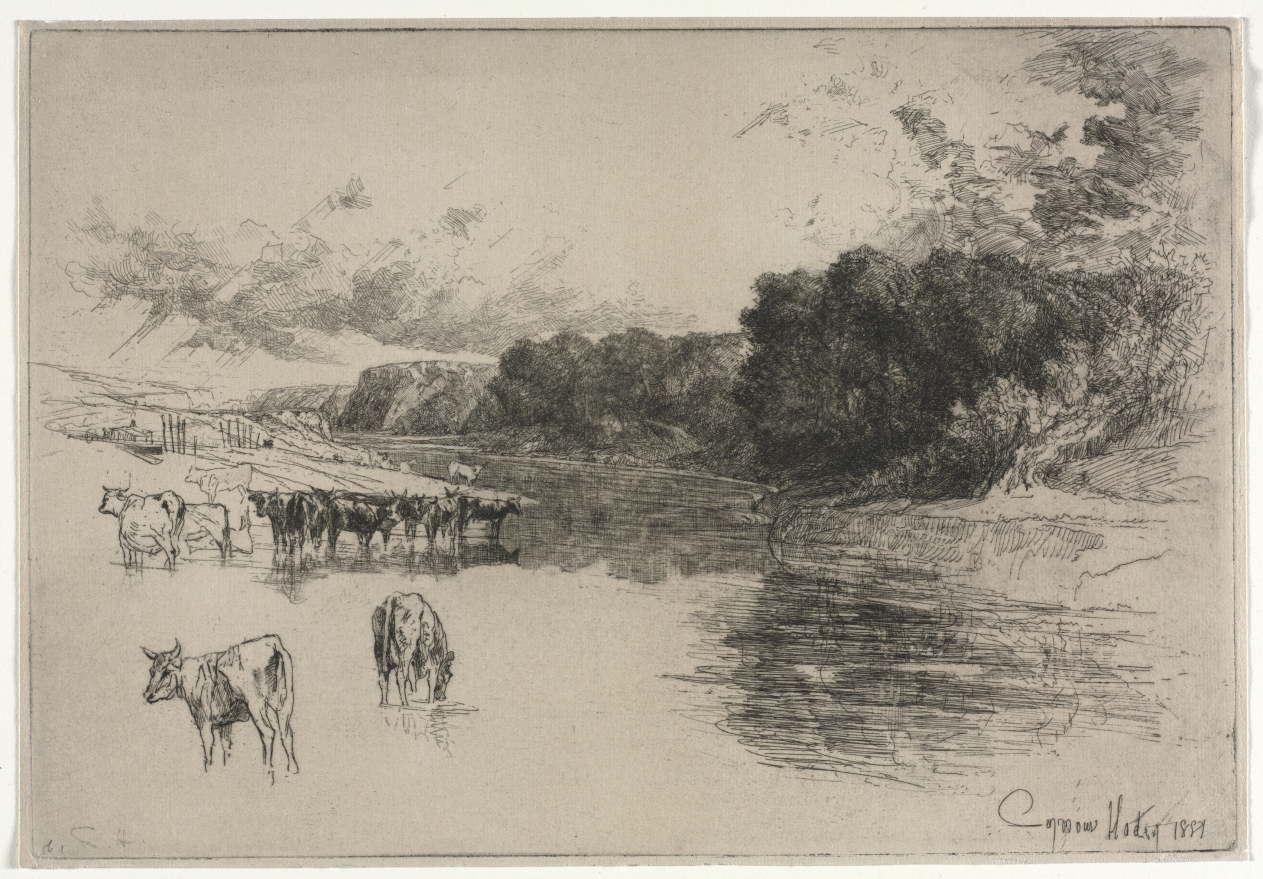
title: A Lancashire River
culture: England, 19th century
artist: Francis Seymour Haden (British, 1818–1910)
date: 1881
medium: etching and drypoint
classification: Print